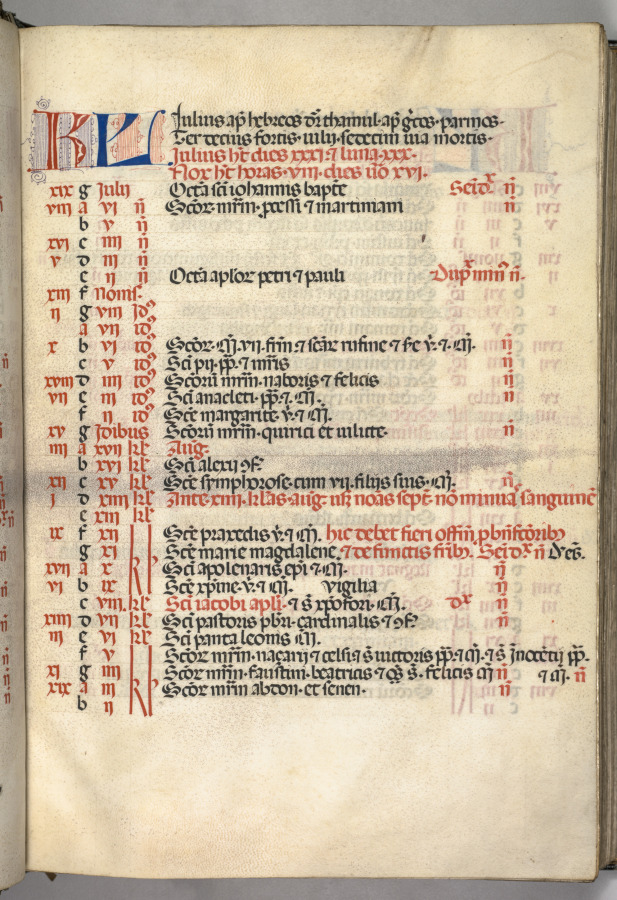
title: Missale: Fol. 6r: July Calendar Page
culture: Italy, Perugia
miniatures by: Bartolommeo Caporali (Italian, c. 1420–1503)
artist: assisted by Giapeco Caporali (Italian, d. 1478)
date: 1469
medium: ink, tempera and burnished gold on vellum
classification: Bound Volume